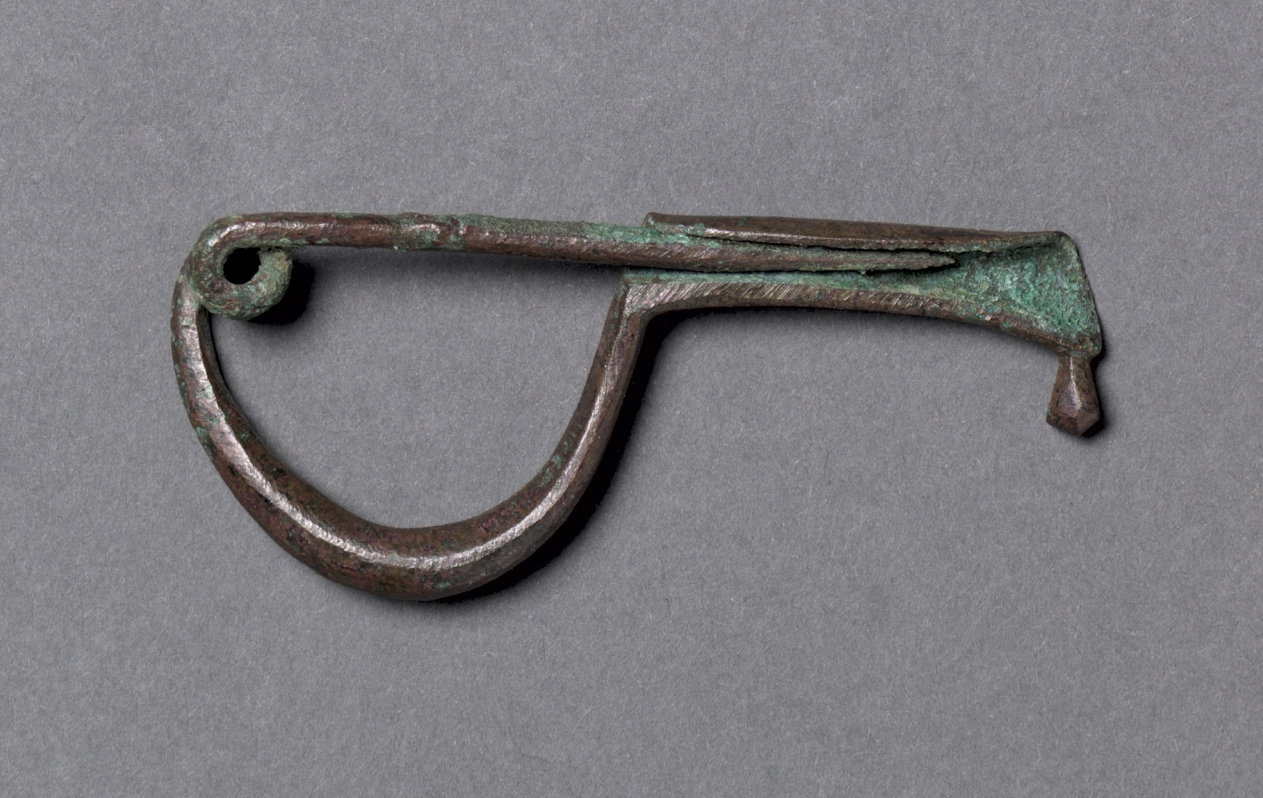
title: Fibula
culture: Italy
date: 900–700 BCE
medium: bronze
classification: Jewelry